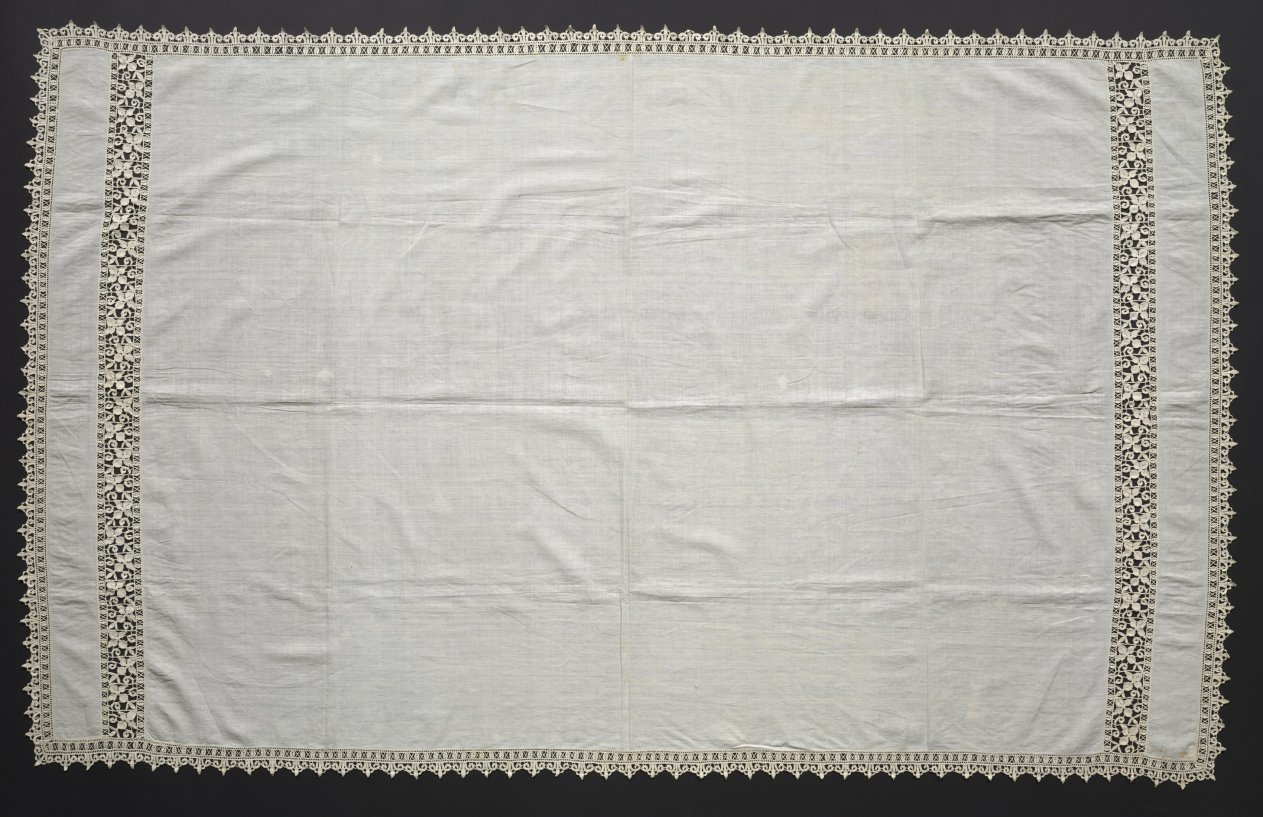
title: Cloth with Lace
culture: Italy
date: 1560–99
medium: Linen: needle lace (reticella and punto in aria)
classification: Lace